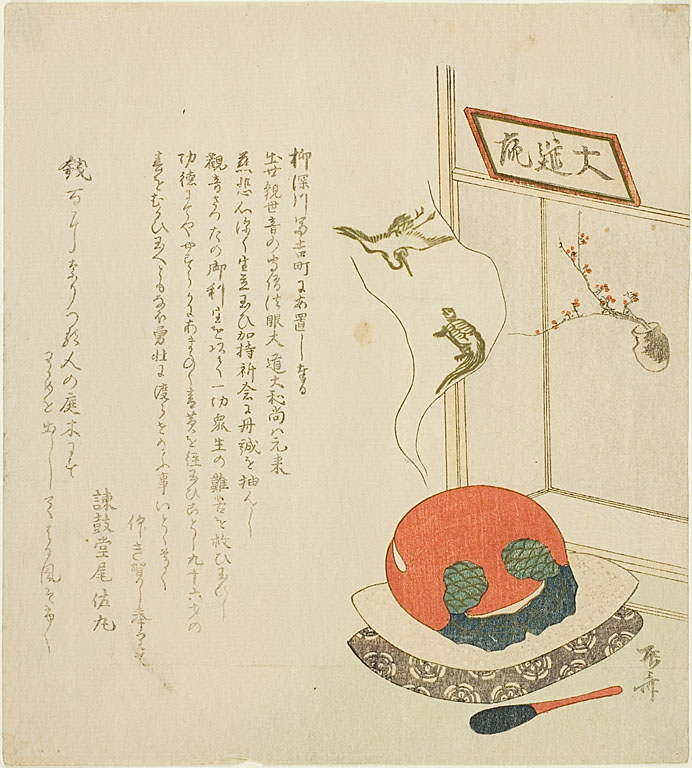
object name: Print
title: The Dream of the Bell, Birthday Greeting for a Priest on his 96th Anniversery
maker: Ryuryukyo Shinsai (Japanese, about 1764-1820)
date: early 19th century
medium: Color woodblock print; surimono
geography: Japan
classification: woodblock print; print; asian art